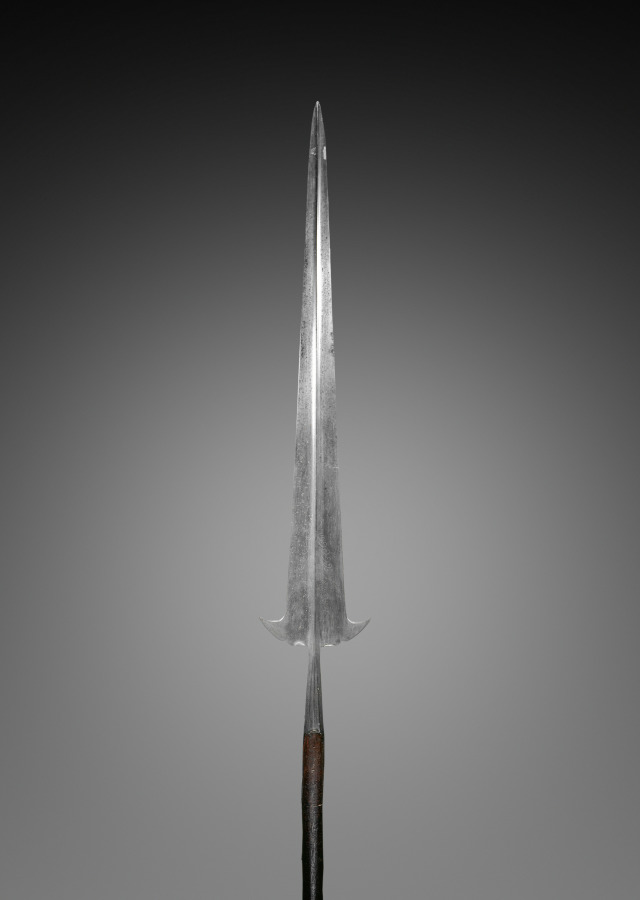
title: Partisan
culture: Italy, 16th century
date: c. 1550–1600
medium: steel, etched; oval wood haft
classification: Arms and Armor